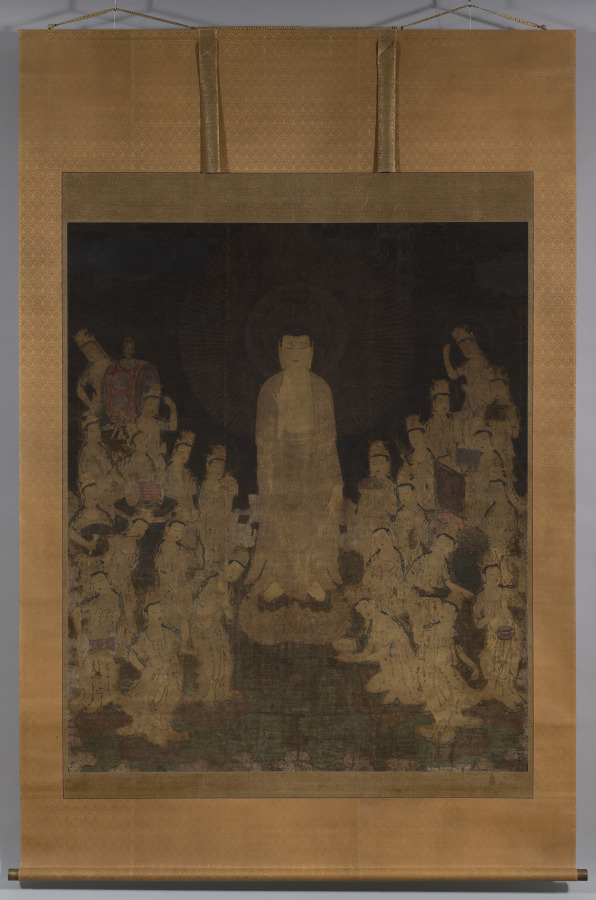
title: Welcoming Descent of Amida with Twenty-Five Bodhisattvas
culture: Japan, Nanbokuchō period (1336–92)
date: mid-1300s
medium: Hanging scroll; ink, color, gold, silver, and cut gold on silk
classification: Painting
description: This painting depicts the Buddha Amida arriving to escort a dying person to his Pure Land, or Western Paradise. He is attended by an entourage of 25 bodhisattvas, enlightened beings who are committed to serving others, many of whom provide orchestral accompaniment to herald the momentous occasion. The bodhisattva Kannon kneels, holding a lotus dais for the deceased to ride to their destination.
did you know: One of the percussive instruments played by the bodhisattvas in the painting is called a paiban or hakuban in Japanese.